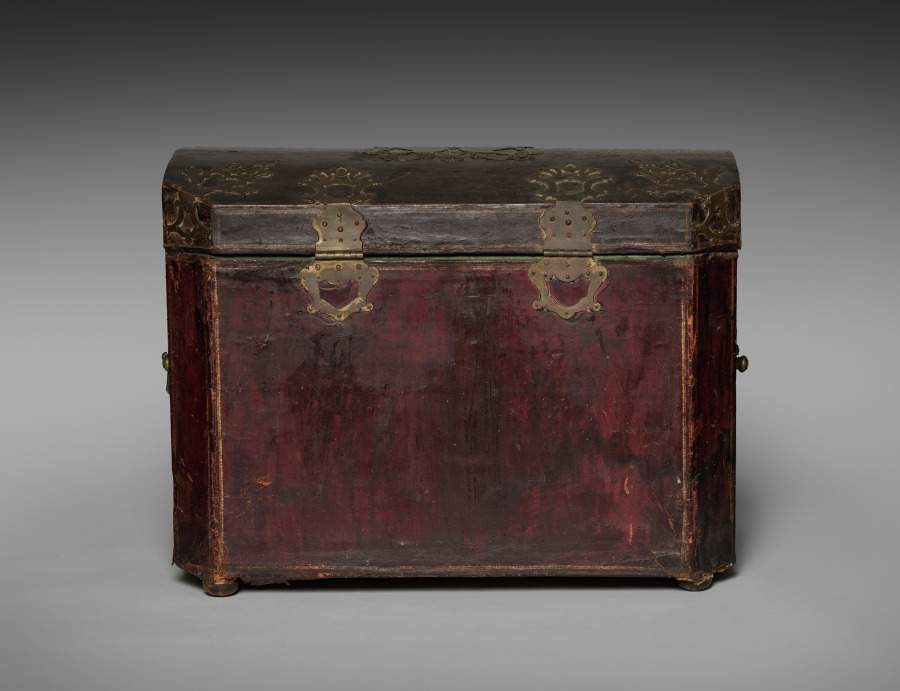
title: Chest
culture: Italy, Venice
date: 1700s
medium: leather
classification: Miscellaneous